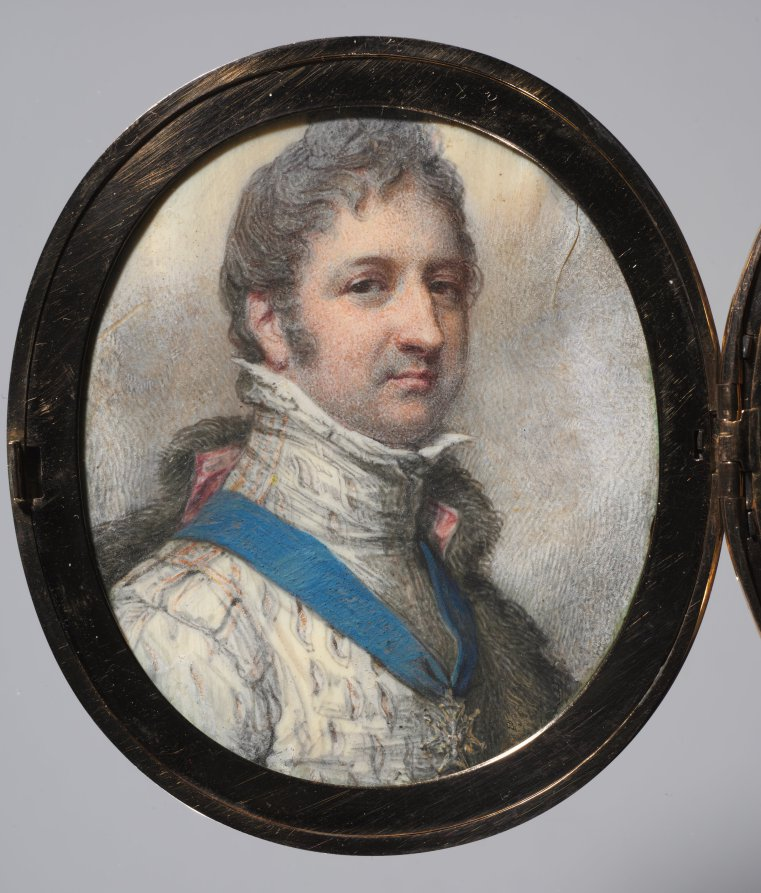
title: Portrait of Louis-Philippe, Duke of Orléans, later King of the French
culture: England, early 19th Century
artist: Richard Cosway (British, 1742–1821)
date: 1804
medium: watercolor on ivory in a gold locket frame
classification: Portrait Miniature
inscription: signed on backing: Rdus Cosway / R.A. et F.S.A. / Primarius Pictor / Serenissimi Walliae / Principie / Pinxit / 1804.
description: Louis-Philippe (1773–1850, king of the French 1830–48) was the son of Louis-Philippe Joseph, duc d’Orléans, who was known as Philippe-Egalité during the French Revolution. The Orléans family was a branch of the House of Bourbon. This work was painted while Louis-Philippe was in exile and living in England from 1800 until 1815, when Napoleon abdicated. He finally succeeded Charles X as king of France in 1830. During the February Revolution of 1848, Louis-Philippe was again forced into exile in England where he died two years later. Richard Cosway had painted Louis-Philippe (as well as his siblings and father) when the family was in England immediately following the outbreak of revolution in 1789. Louis-Philippe would have been thirty-one years old when this work was executed. He wears the Order of the Holy Spirit, a chivalric order of the French monarchy, which can be distinguished by its white dove surrounded by green flames at the center of a Maltese cross, with fleur-de-lis between the arms of the cross. Instead of the brilliant turquoise and white cloud background traditionally associated with Cosway, this miniature has the more restrained, gray, hatched background that characterizes the artist’s later works. The surface of the work is much marred by an irreversible crystallization of the paint layer that further emphasizes the gray tones throughout. The form of the unmarked case is typically English, but the motif is French, which may indicate a French goldsmith imitating the English style. The motif resembles a swan composed of foliate scrolls. A lock of plaited brown hair is also enclosed under glass within the locket, facing the miniature.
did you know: Without DNA analysis it is impossible to know to whom the hair belonged, though the most likely candidate is Louis-Philippe himself.